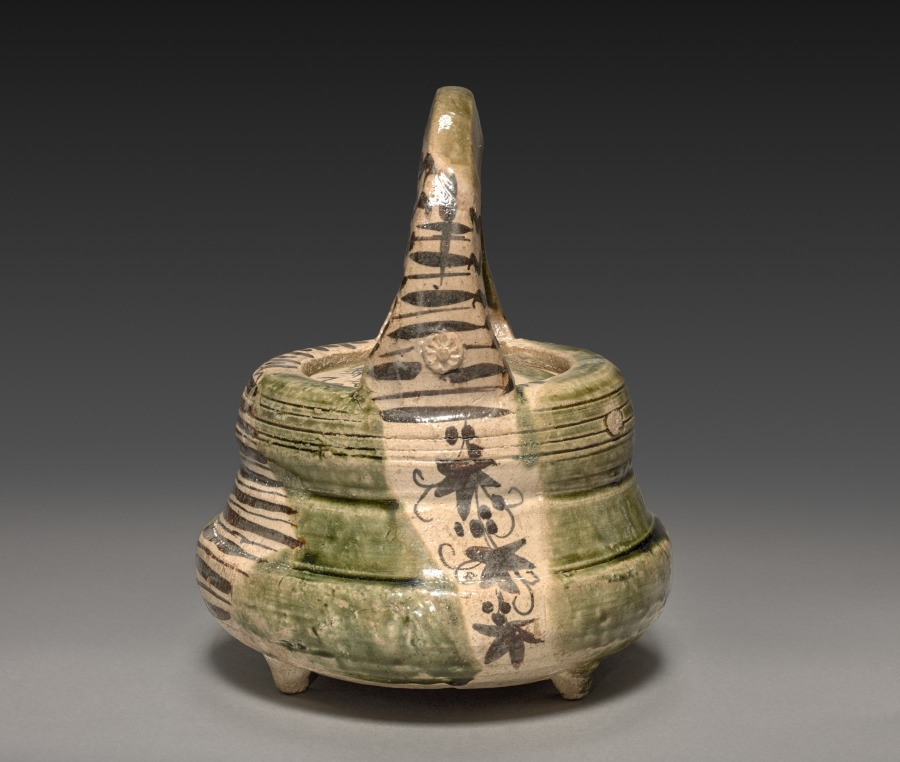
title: Ewer (Suichū)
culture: Japan, Momoyama period (1573–1615)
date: early 1600s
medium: Glazed stoneware with iron oxide underglaze slip (Mino ware, Oribe type)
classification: Ceramic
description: This ewer was made to replenish the jar that holds water for rinsing teabowls and filling the iron kettle at tea gatherings. Highly abstracted pine trees, cascading ivy, stripes, and grids make up the designs in underglaze iron oxide, while the overall surface alternates between a transparent glaze and a green glaze characteristic of some Oribe tea wares.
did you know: Oribe wares are named for the tea master Furuta Oribe, who initiated the flamboyant designs that characterize them.